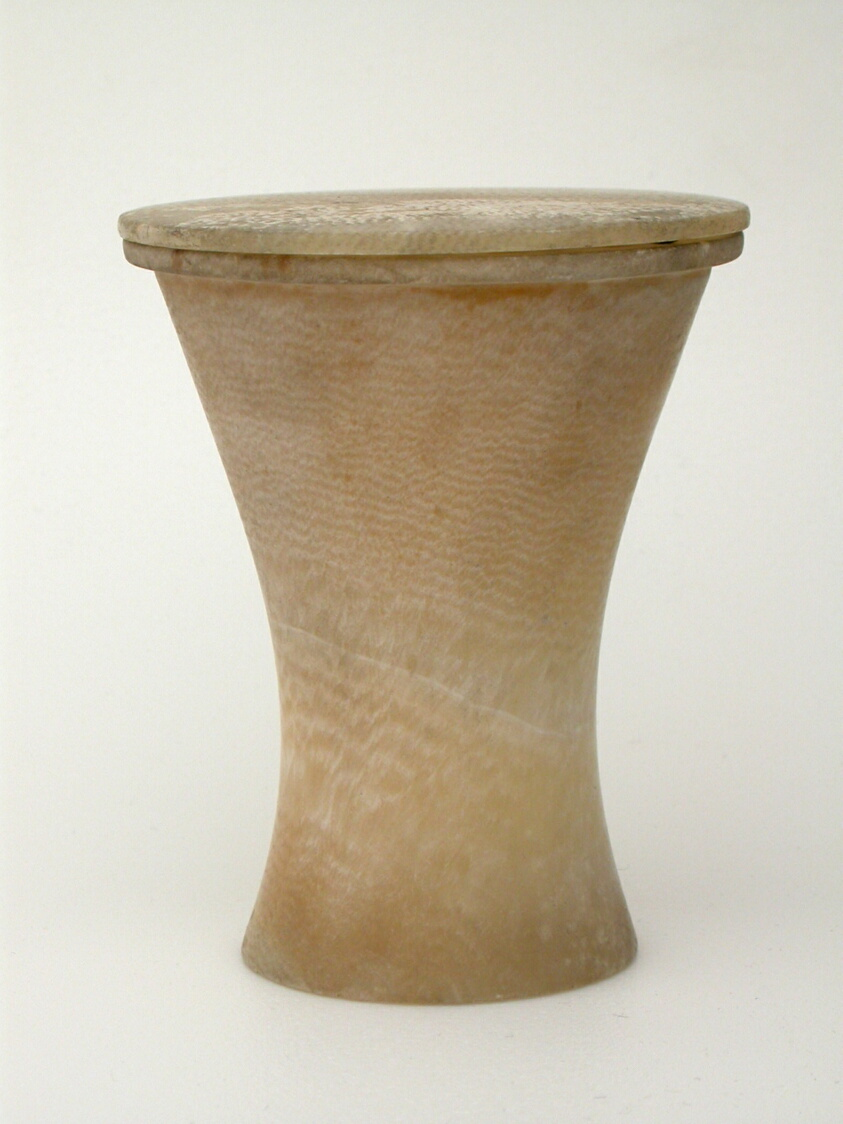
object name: Vessel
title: Unguent Vessel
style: first dynasty, early dynastic (egyptian)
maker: Egyptian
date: Middle Kingdom, Dynasty 12 (about 1985–1773 BCE)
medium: Travertine (Egyptian alabaster)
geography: Egypt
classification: personal grooming / hygiene / cosmetic container; stone; vessel; ancient art